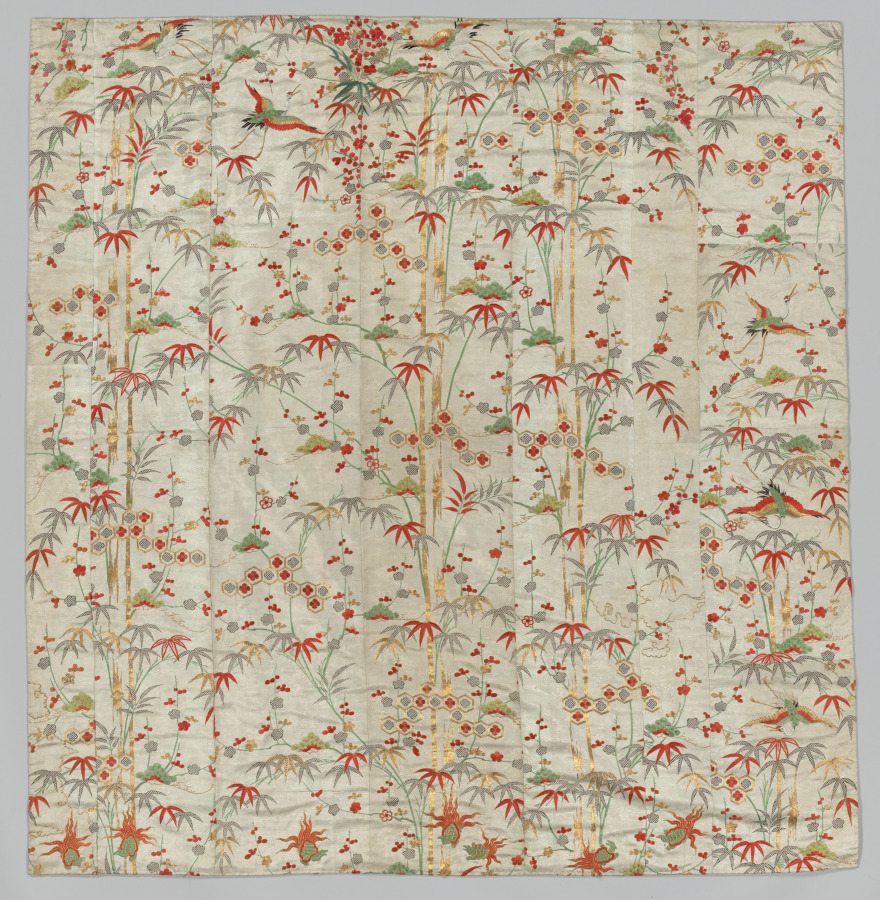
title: Hanging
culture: Japan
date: mid-1700s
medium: silk, embroidered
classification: Embroidery